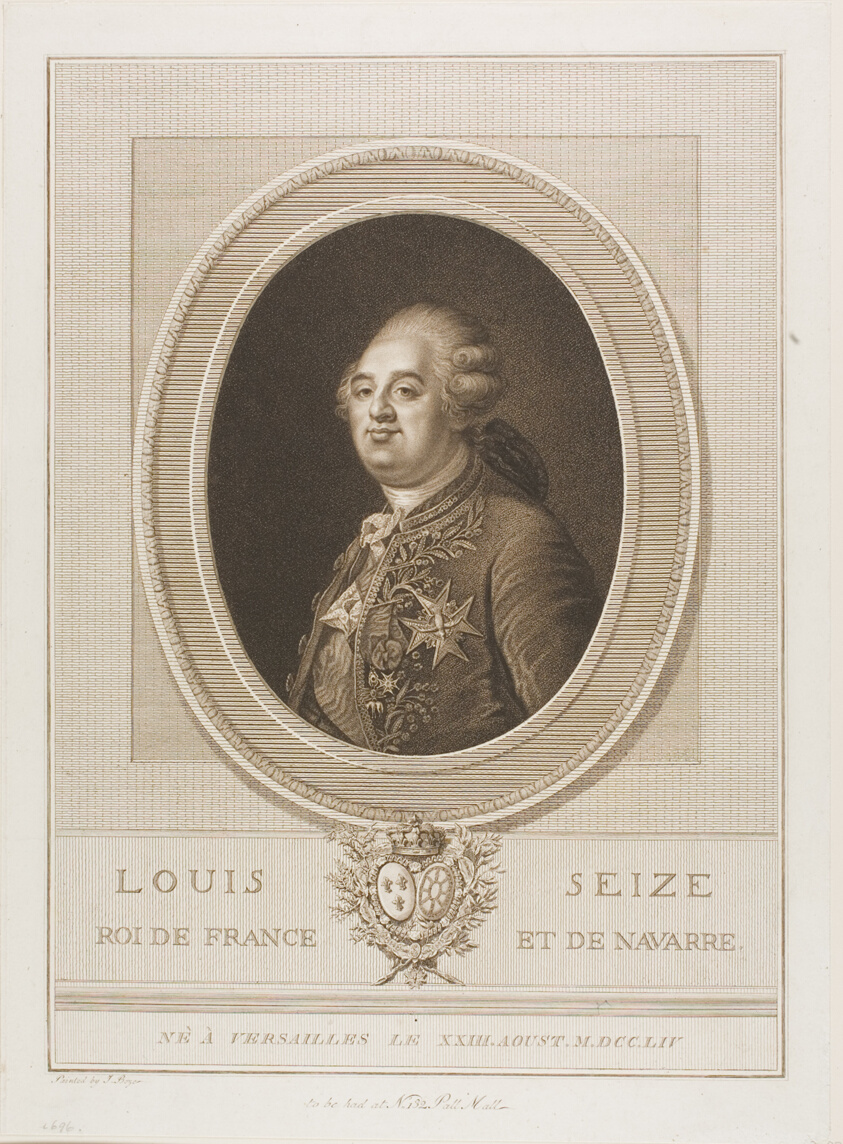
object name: Print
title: Louis Seize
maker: Francesco Bartolozzi (Italian, 1727-1815)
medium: Etching and engraving on paper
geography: Italy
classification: etching; print; prints and drawing